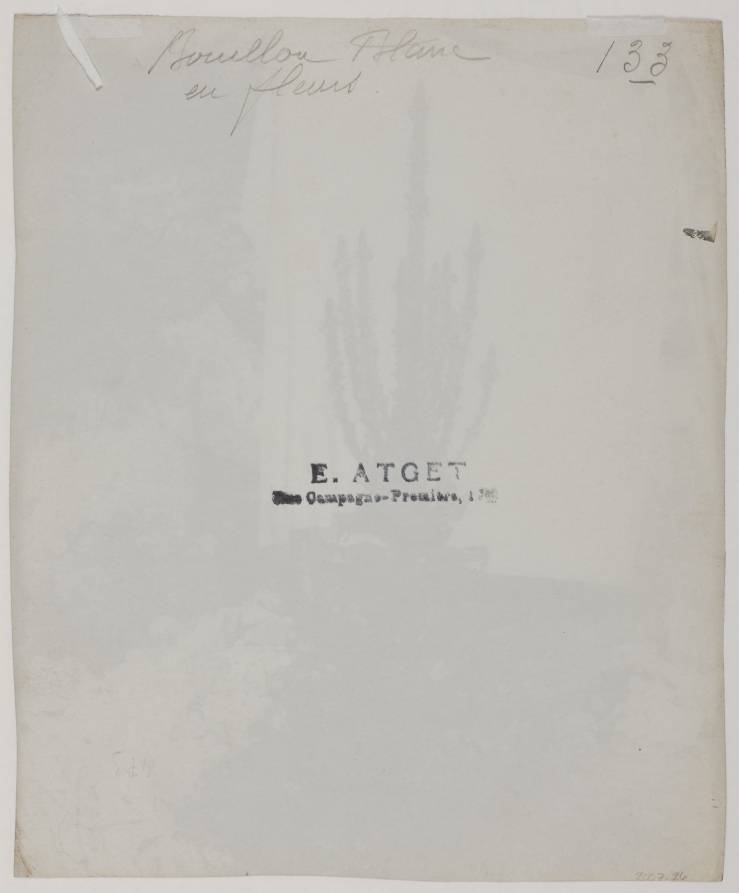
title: Mullein in Bloom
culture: France, 20th century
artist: Eugène Atget (French, 1857–1927)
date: c. 1897–1899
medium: albumen print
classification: Photograph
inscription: Written in pencil on verso: "Bouillon Blanc/En Fleur 133"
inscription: Black stamp on verso of print: E. Atget/Rue Campagne-Premié re, 17 bis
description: Atget produced architectural details, views of historic Paris, landscapes, and botanical images for use by painters and illustrators. Despite being a product of the 19th century, he was greatly admired by the avant-garde photographers of the 1920s. Modernists esteemed the straightforwardness of his photographs, while the Surrealists found inspiration in their evocative power. An artist or illustrator using this image of a common plant used in herbal remedies would have ignored the landscape background. But the Surrealists would have appreciated the unexpected, unintended surrealism of its odd juxtaposition of sheet, plant, and landscape.